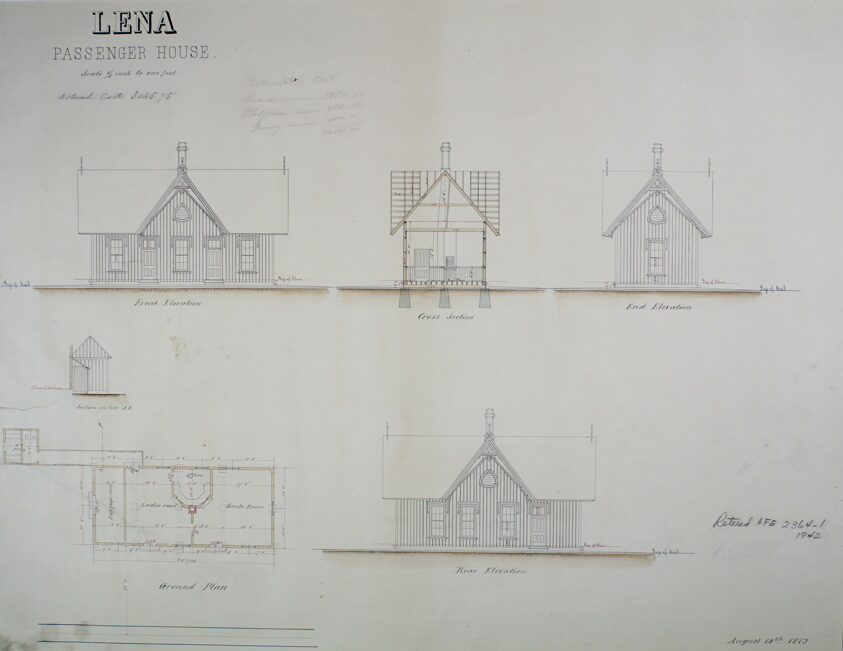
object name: Architectural Drawing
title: Lena Passenger House, Lena, Illinois, Plan, Elevations, and Sections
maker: James Nocquel (American, 19th century)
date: 1873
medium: Black and colored ink on paper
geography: Lena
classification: architectural drawing; architectural working drawing; architecture